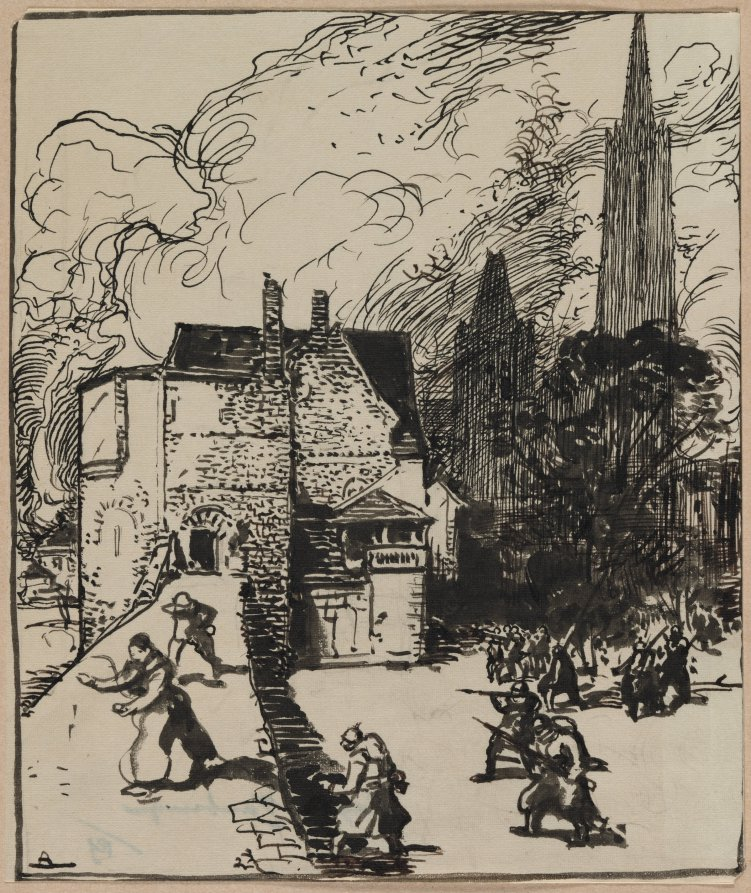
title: Siège des Maubeuge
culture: France, 20th century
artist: Auguste Louis Lepère (French, 1849–1918)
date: 1914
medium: brush and pen and black ink with touches of brown ink and pen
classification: Drawing